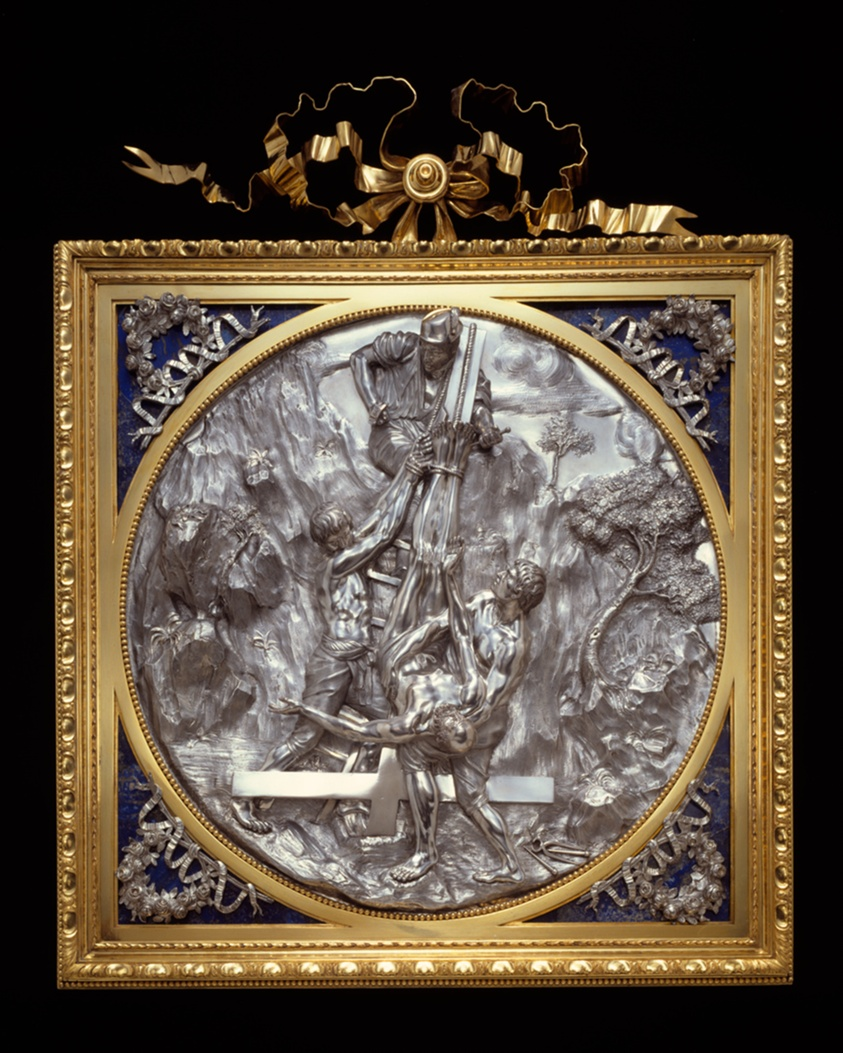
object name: Sculpture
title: Crucifixion of Saint Peter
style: 18th Century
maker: Luigi Valadier and workshop (Italian, 1726–1785)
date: 1770–80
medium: Silver, gilt bronze, lapis lazuli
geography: Rome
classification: european decorative arts; relief; bronze; silver; stone; sculpture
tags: saints, Christian subjects, Christianity, metal, metalwork, religion, religious, religious figures, religious scenes, sculpture, silver